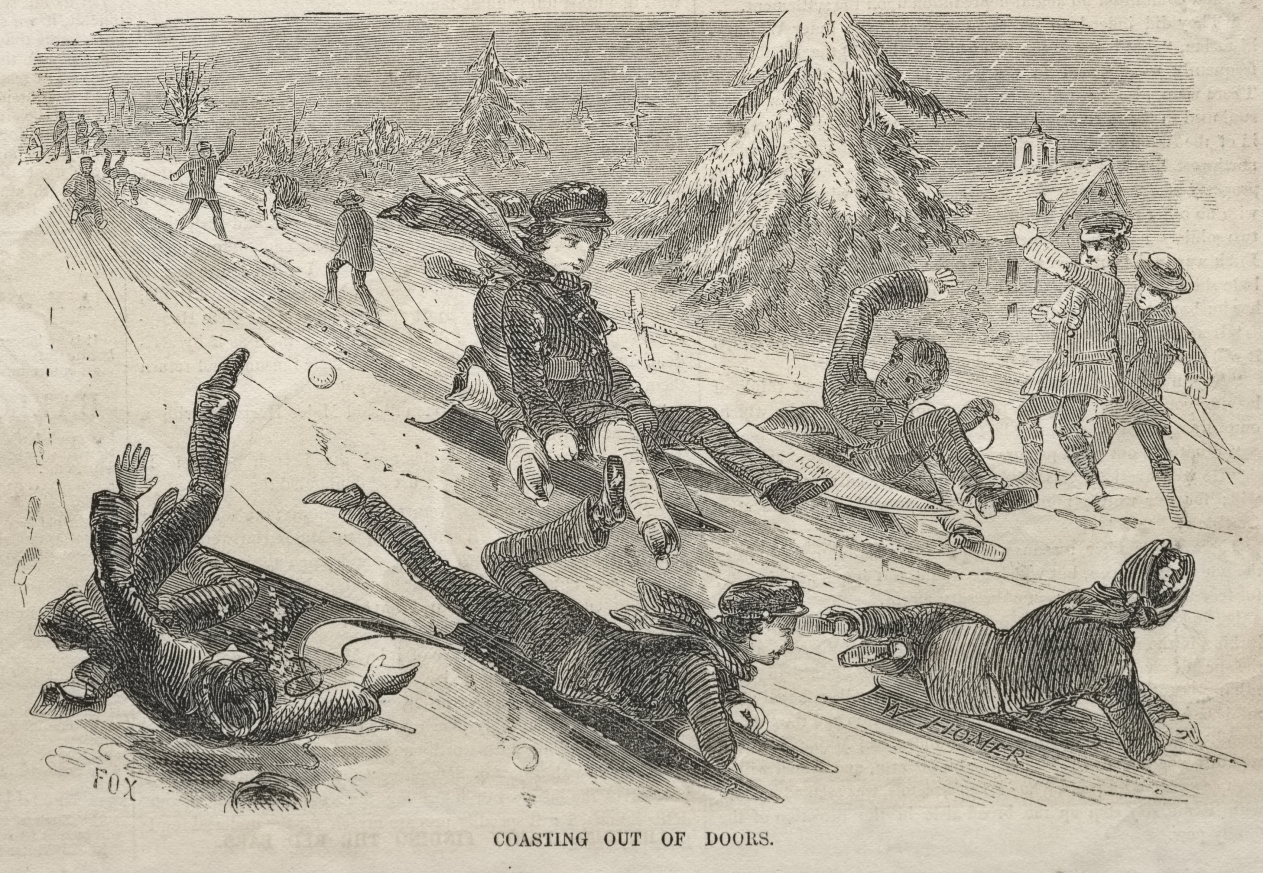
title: Coasting Out of Doors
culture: America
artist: Winslow Homer (American, 1836–1910)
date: 1857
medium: wood engraving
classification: Print